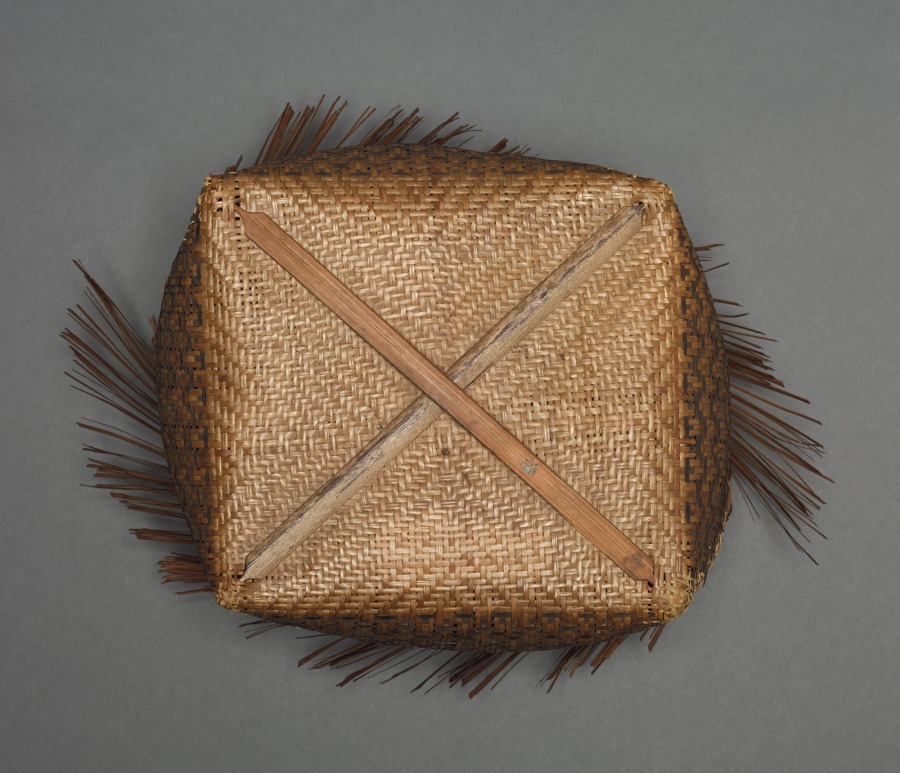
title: Hat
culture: Africa, Central Africa, Democratic Republic of the Congo, Mangbetu-style maker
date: before 1929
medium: Plant fibers and dye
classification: Garment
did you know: This woven hat looks brand new because it was one of the many items the business-savvy chief of Ekibondo had artists and artisans make for the foreigners who passed through his village.